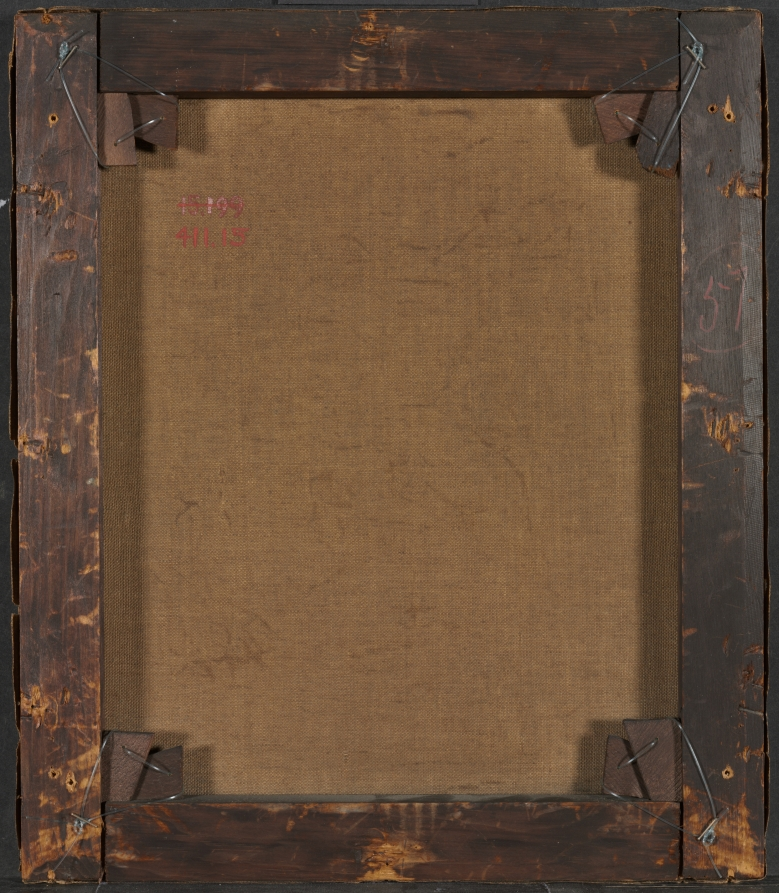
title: Apple Blossoms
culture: America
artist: Martin Johnson Heade (American, 1819–1904)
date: 1873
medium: oil on canvas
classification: Painting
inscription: signed lower left: MJ Heade 1873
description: Martin Johnson Heade painted approximately 150 floral still life compositions during his long career. In this relatively stark example, a single branch of apple blossoms is propped on a tabletop and supported by an undecorated wall.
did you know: The artist was very fond of flowers and took pleasure in gathering and arranging bouquets, especially for his breakfast table.